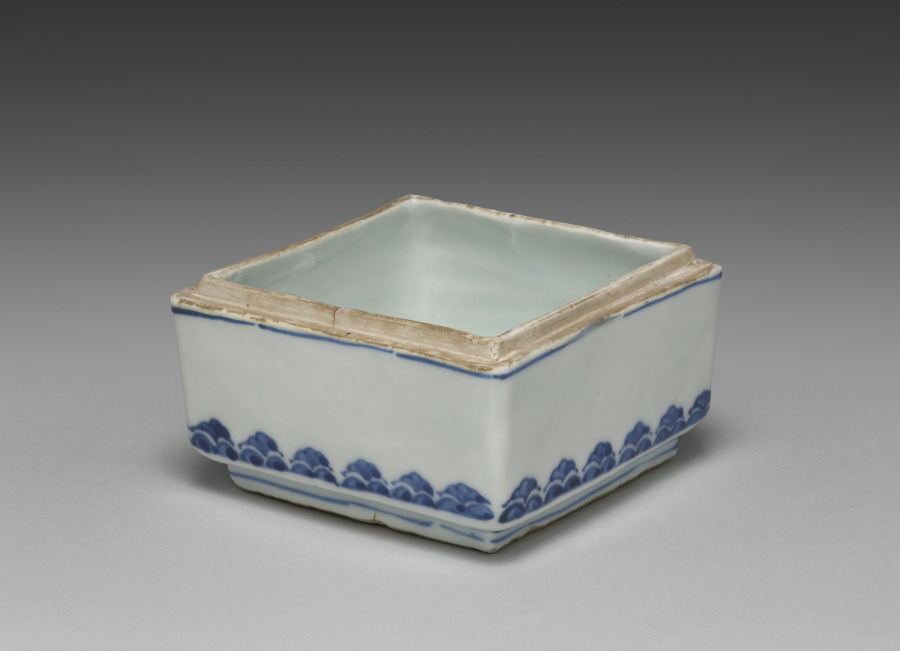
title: Box with Butterfly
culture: Japan, Meiji period (1868–1912)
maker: Seifū Yohei I (Japanese, 1801–1861)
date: 1855–57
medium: Porcelain with underglaze blue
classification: Ceramic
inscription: 清風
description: This sturdy box, with comparatively thick walls and resulting heft, is sparsely decorated with a single butterfly motif in dark underglaze blue cobalt in one corner of the lid and with repeating floral patterns along the lid and base. Single broken lines of underglaze blue define the edge of the box lid’s top where it curves to meet the sides and again where it meets the base of the box. Another blue band runs around the upper rim of the base where it meets the lip, left unglazed for a better grip of the lid when the box is closed. Yohei I’s signature on the center of the recessed base is set within a wide blue square. The porcelain box is meant to call to mind a famous story attributed to Zhuang Zhou (c. 369–286 BCE), also known as Master Zhuang, or Zhuangzi, pronounced Soji in Japanese. The second chapter of Zhuangzi, his eponymous collection of anecdotes, records the story as follows: Once, Zhuang Zhou dreamt he was a butterfly, a butterfly flitting and fluttering about, happy with himself and doing as he pleased. He didn’t know that he was Zhuang Zhou. Suddenly, he woke up and there he was, solid and unmistakable Zhuang Zhou. But he didn’t know if he was Zhuang Zhou who had dreamt he was a butterfly, or a butterfly dreaming that he was Zhuang Zhou. Between Zhuang Zhou and the butterfly there must be some distinction! This is called the Transformation of Things. The lidded box resembles kosometsuke, the porcelains in underglaze blue made to order or on speculation for the Japanese market during the early to mid-1600s in Jingdezhen, China. These works were often made from designs submitted by Japanese clients, many of whom were masters of chanoyu, who sought the wares for their tea practice. The relative roughness of the clay and the distortions in the fired object were intentional, as they created the rustic effect desired by Japanese tea communities.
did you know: Seifū Yohei I made blue and white porcelains after Ming dynasty (1368–1644) Chinese wares fired in the kilns at Jingdezhen for export.